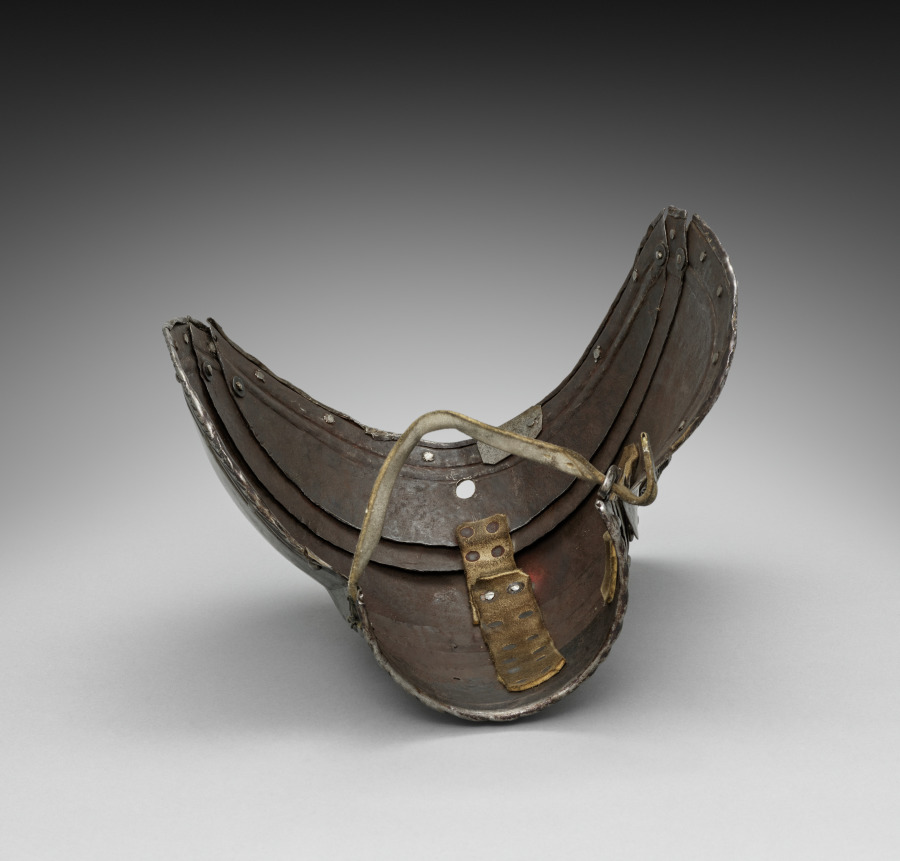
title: Left Pauldron with Guard Brace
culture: Germany, 19th century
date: 1801–1900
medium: steel with black paint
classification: Arms and Armor